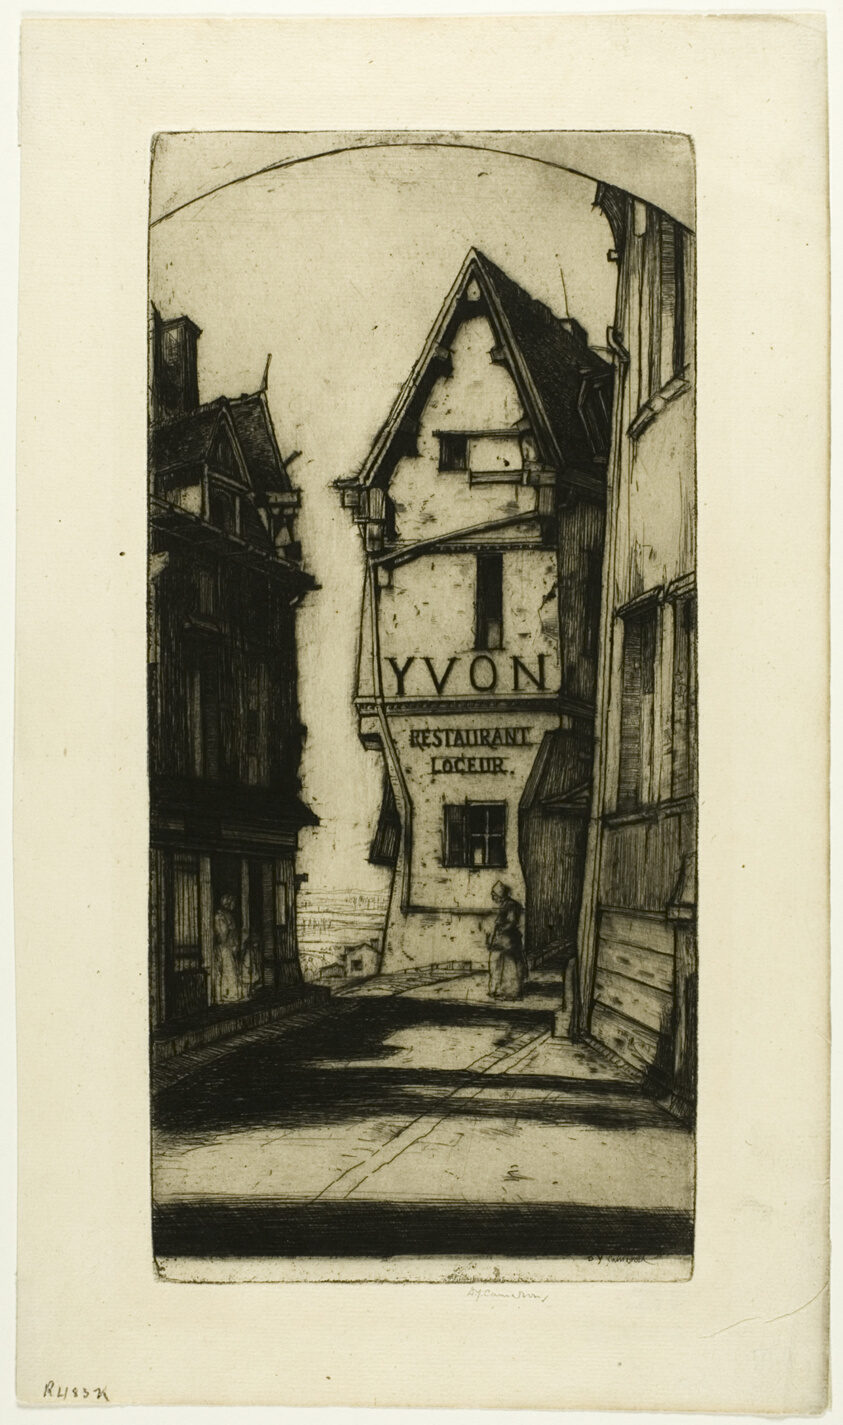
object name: Print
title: Yvon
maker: David Young Cameron (Scottish, 1865-1945)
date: 1911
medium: Etching and drypoint on ivory laid paper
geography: Scotland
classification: etching; print; prints and drawing